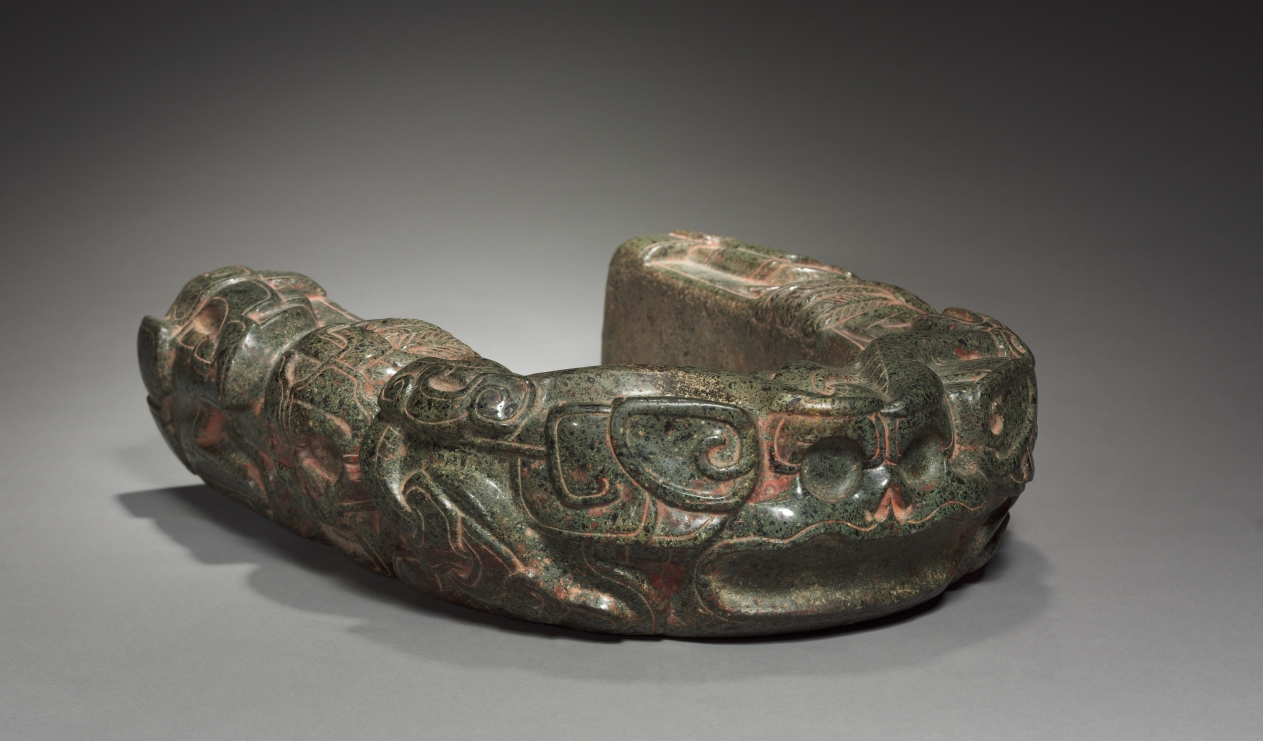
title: Ballgame Hip Protector (Yoke)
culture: Mexico, Gulf Coast, Classic Veracruz style (600-1100)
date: 600–900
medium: greenstone, pigment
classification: Sculpture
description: U-shaped ballgame sculptures imitate the shape of belt-like protectors, perhaps made of wood and padding, worn to shield ballplayers from injury when they returned the solid rubber ball from their hips. This fine example embodies a major theme of the ballgame: the connection between fertility and death. It is made of greenstone, a precious material that through its color symbolizes the lush burgeoning of nature after the rainy season. The imagery, however, is menacing: a monstrous head snarls from the curve, and human skulls appear on the sides.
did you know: The ballgame was a team sport played on specially constructed rectangular courts and involved striking a large solid rubber ball without using your hands.